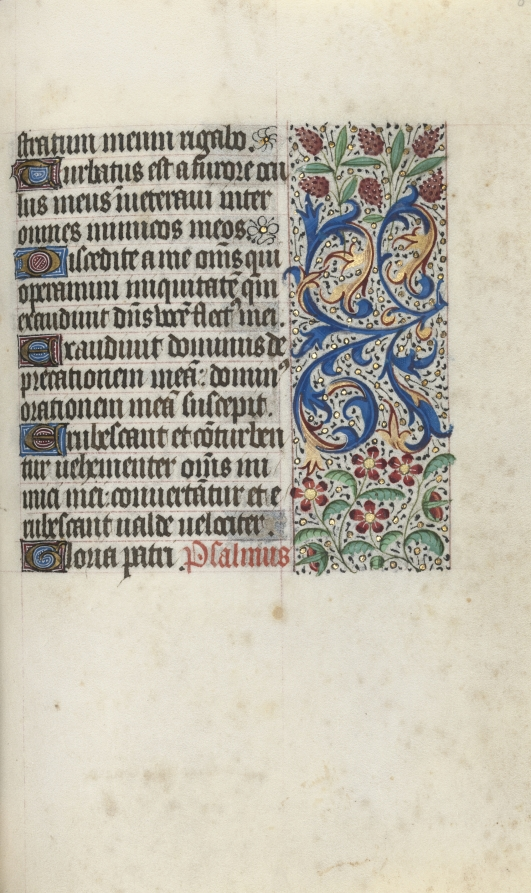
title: Book of Hours (Use of Rouen): fol. 81r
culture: France, Rouen, 15th century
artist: Master of the Geneva Latini (French, active Rouen, 1460–80)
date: c. 1470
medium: ink, tempera, and gold on vellum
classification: Bound Volume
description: In the late 1400s and early 1500s Rouen was an established and important center of book production. The city’s cathedral had a wealthy chapter that spent large sums of money to commission books and to maintain its extensive library. The stationers and booksellers would have likely been concentrated in or near the cathedral precinct. This artist, named after a manuscript now in Geneva, was Rouen’s principal illuminator during the second half of the 1400s.